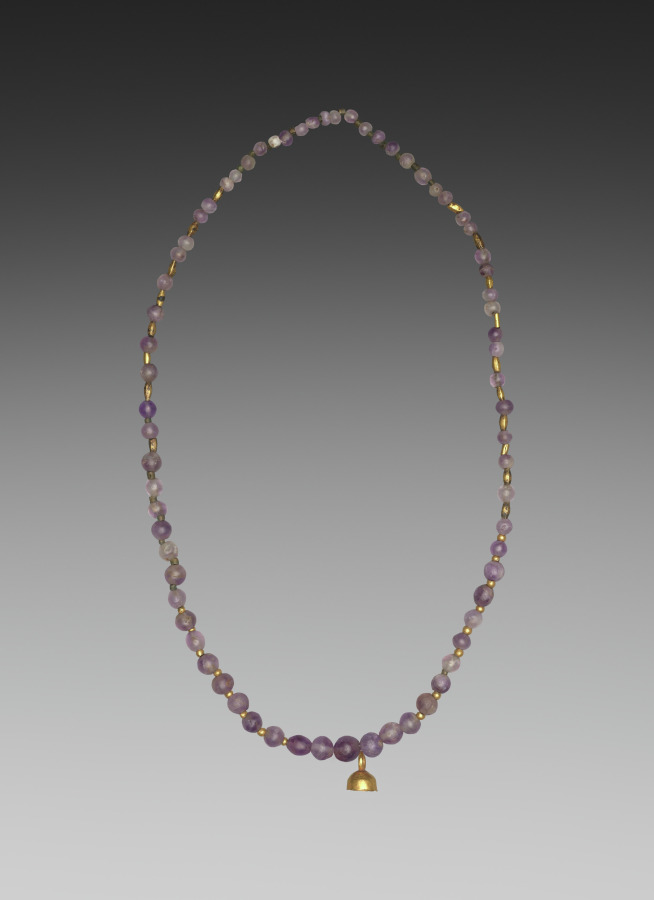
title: String of Beads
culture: Egypt, Middle Kingdom (2040–1648 BCE)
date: 2040–1648 BCE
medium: amethyst and gold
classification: Jewelry